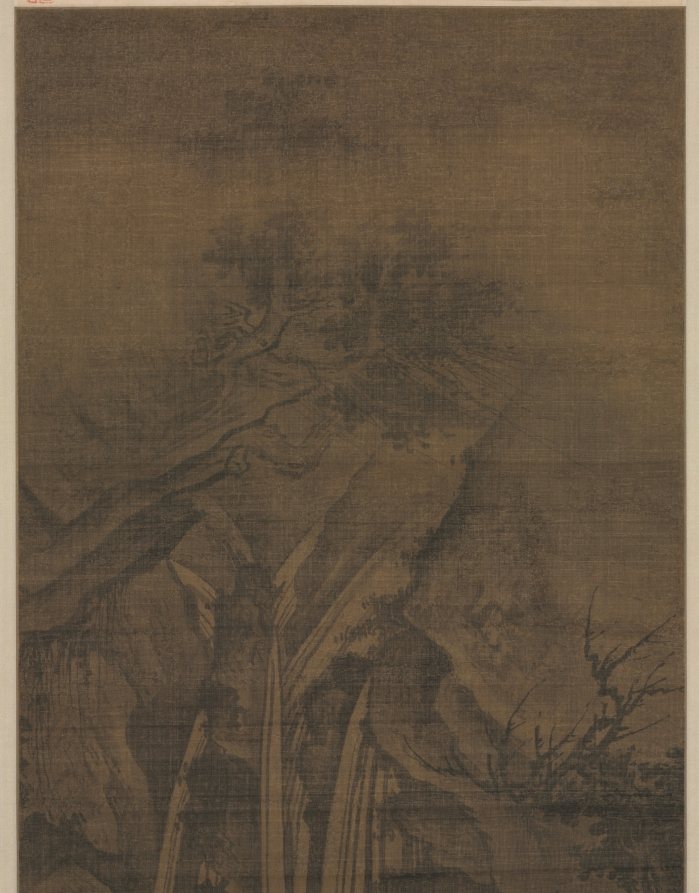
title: Waterfall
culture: China, Song dynasty (960-1279) - Yuan dynasty (1271-1368)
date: 1271–1368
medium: hanging scroll, ink and slight color on silk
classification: Painting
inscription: Label on the mounting with 2 seals of T'ang ? of Pi-ling (16th c.); label on back of mounting of Kü Kuang-hsü (1731-1797). 1 colophon and 8 additional seals: 1 colophon, dated 1625, and 2 seals of Kao P'an-lung (1562-1626); 2 seals of Liu Shu (1759-1816); 1 seal of Pi Lung (late 18th c.); 1 seal of Ts'ao tzu-wen; 2 seals unidentified. WKH